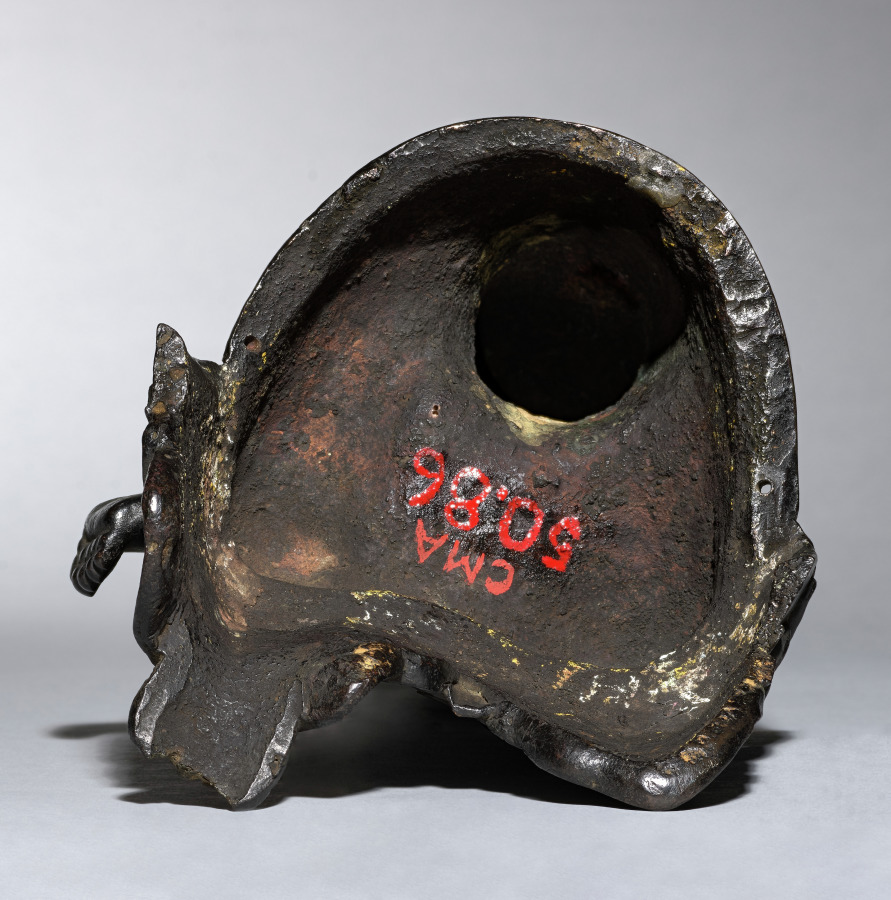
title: Buddha of the Future (Miroku Bosatsu)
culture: Japan, Asuka period (538–710)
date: late 600s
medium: cast bronze, incised, with traces of gilding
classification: Sculpture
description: Buddhism was introduced to Japan in the sixth century. For early Japanese devotees, Buddhism offered the promise of salvation through faith in the Buddha of the Future, who would appear at the end of the world. The concept of eternal salvation held particular resonance with the Japanese aristocracy, who became the staunchest supporters of this new faith. Small sculptures like this one, with its gentle grace and powerful presence, were popular devotional objects.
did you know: The Sanskrit name of this being, Maitreya, derives from the Sanskrit word for friend, mita.